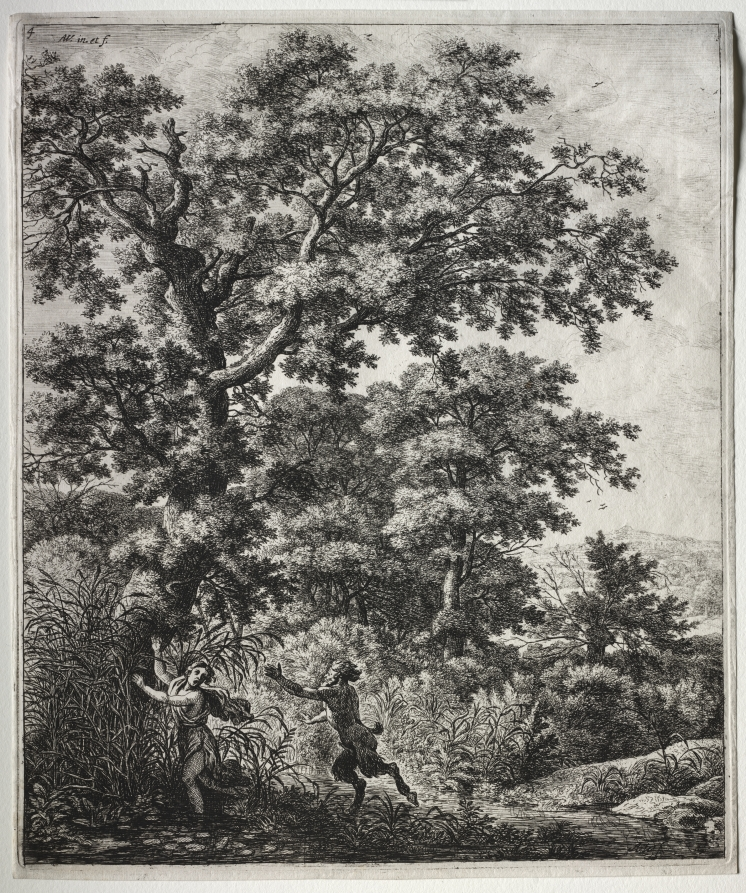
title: Six large upright landscapes with scenes from Ovid's Metamorphoses: Pan and Syrinx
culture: Netherlands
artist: Anthonie Waterloo (Dutch, 1609/10–1690)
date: 1640–90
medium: etching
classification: Print